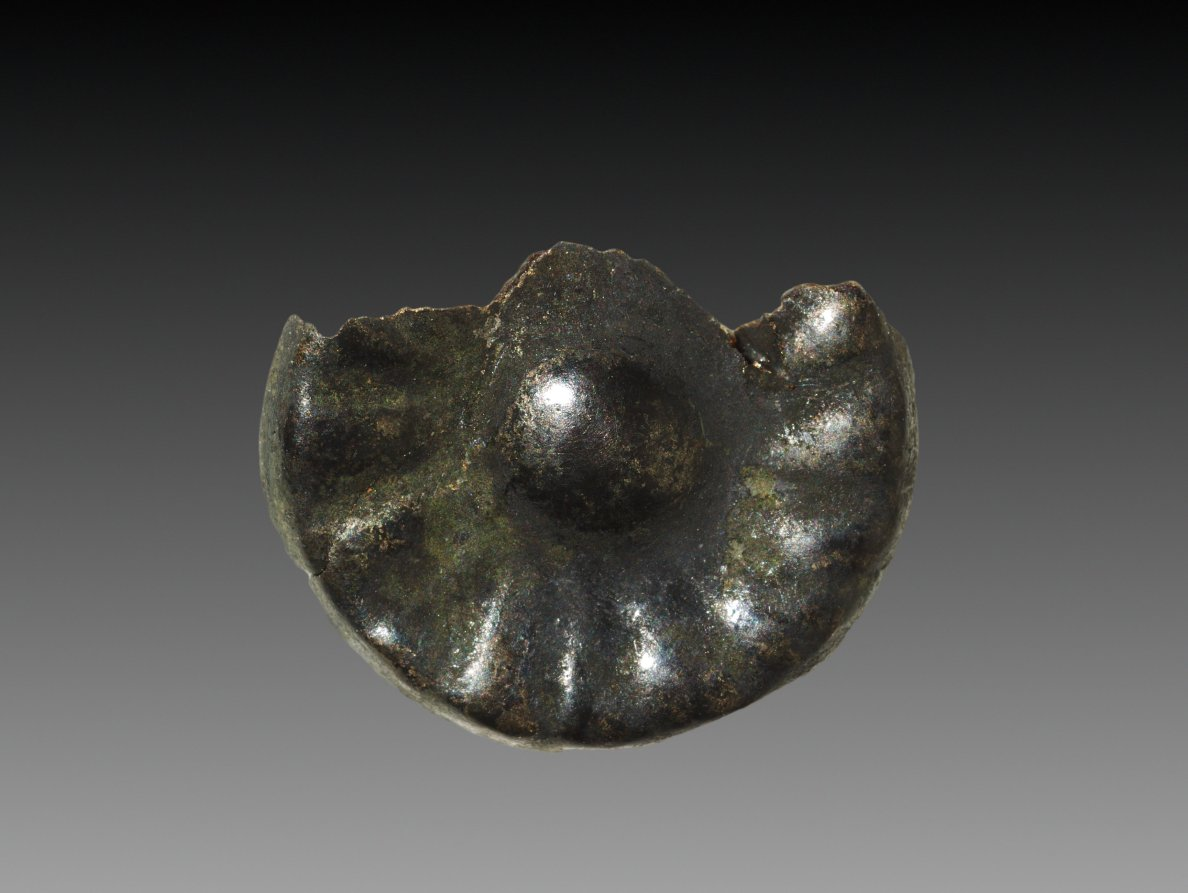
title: Rosette for Wig Decoration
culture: Egypt, Middle Kingdom (2040–1648 BCE), Dynasty 12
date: 1980–1801 BCE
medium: silver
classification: Jewelry